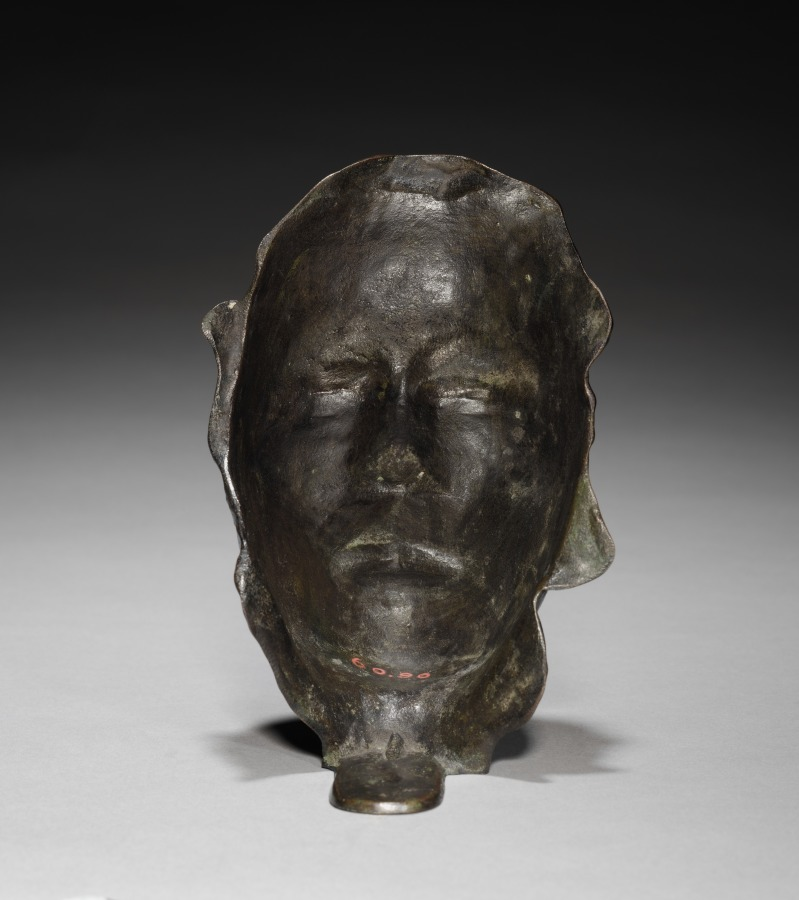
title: Mask of the Japanese Actress Hanako (Ohta Hisa)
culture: France, early 20th Century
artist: Auguste Rodin (French, 1840–1917)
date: 1908 (?)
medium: bronze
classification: Sculpture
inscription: Signed sinister side of neck: "A. Rodin"; inside sinister side in relief: "A. Rodin"